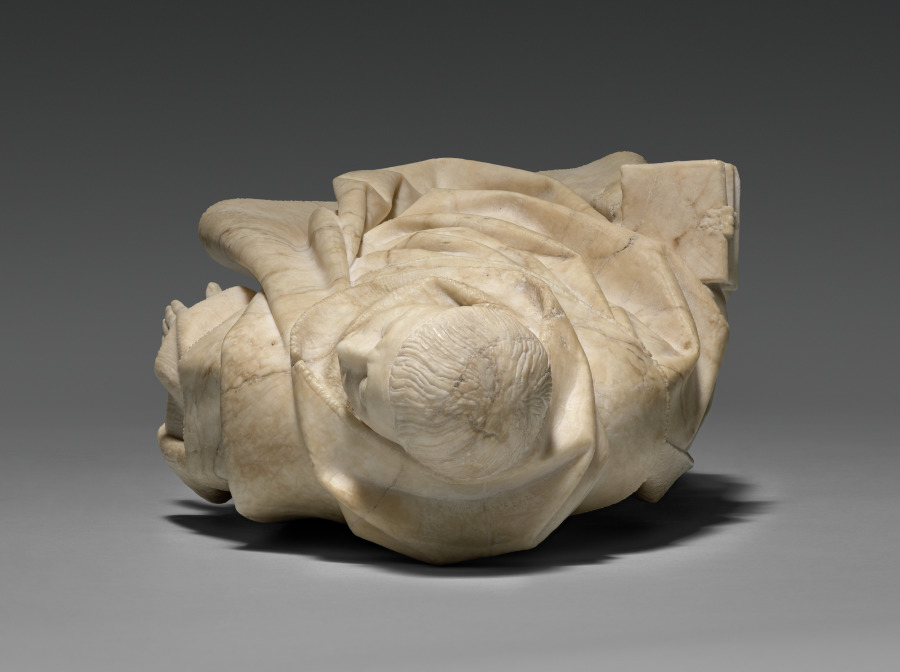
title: Mourner from the Tomb of John the Fearless and Margaret of Bavaria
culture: Spanish, Burgundy, Dijon, 15th century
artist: Jean de la Huerta (Spanish, active Burgundy, 1431–62)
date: 1443–45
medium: salins alabaster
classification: Sculpture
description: This monklike figure has a variously textured monochrome surface. Alabaster’s softness made it easy to carve details like the fabric and fur of the mourner’s robe and the codex pages in his hand. This is one of 40 mourners from an elaborate funeral procession beneath an intricately carved alabaster arcade. This mourner comes from the monastery of Champmol near Dijon, which became a primary burial place for Burgundian dukes. The sculpture was part of the tomb of John the Fearless (1371–1419), commissioned by his son Philip the Good (1396–1467), modeled after the earlier monument for Philip the Bold.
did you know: A plaster cast of this mourner adorns the Tomb of John the Fearless and Margaret of Bavaria in Dijon, France.